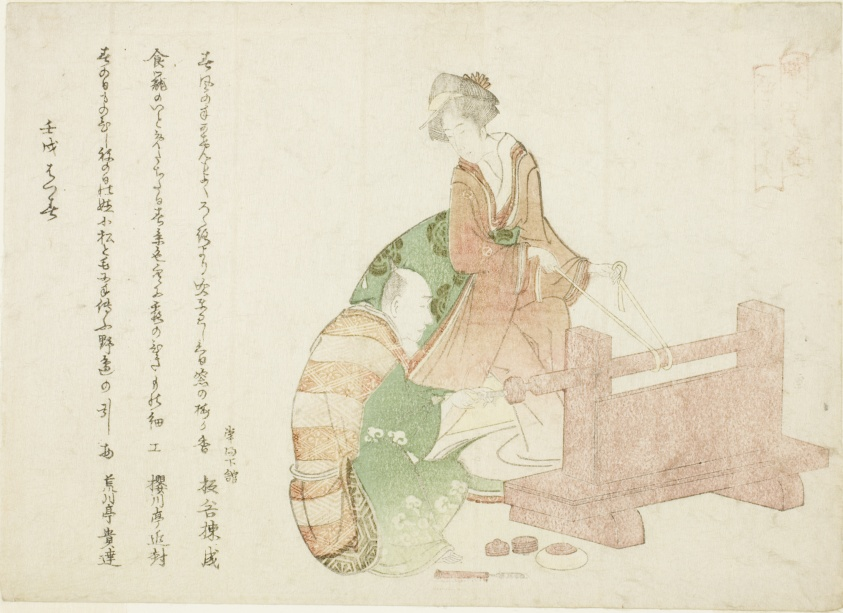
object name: Print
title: A turner and his assistant, from the series "Thirty-six Poets as Craftsmen (Shokunin sanjurokuban)"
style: Japanese (culture or style)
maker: Katsushika Hokusai 葛飾 北斎; Japanese, 1760-1849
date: 1802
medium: Color woodblock print; surimono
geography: Japan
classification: woodblock print; print; asian art